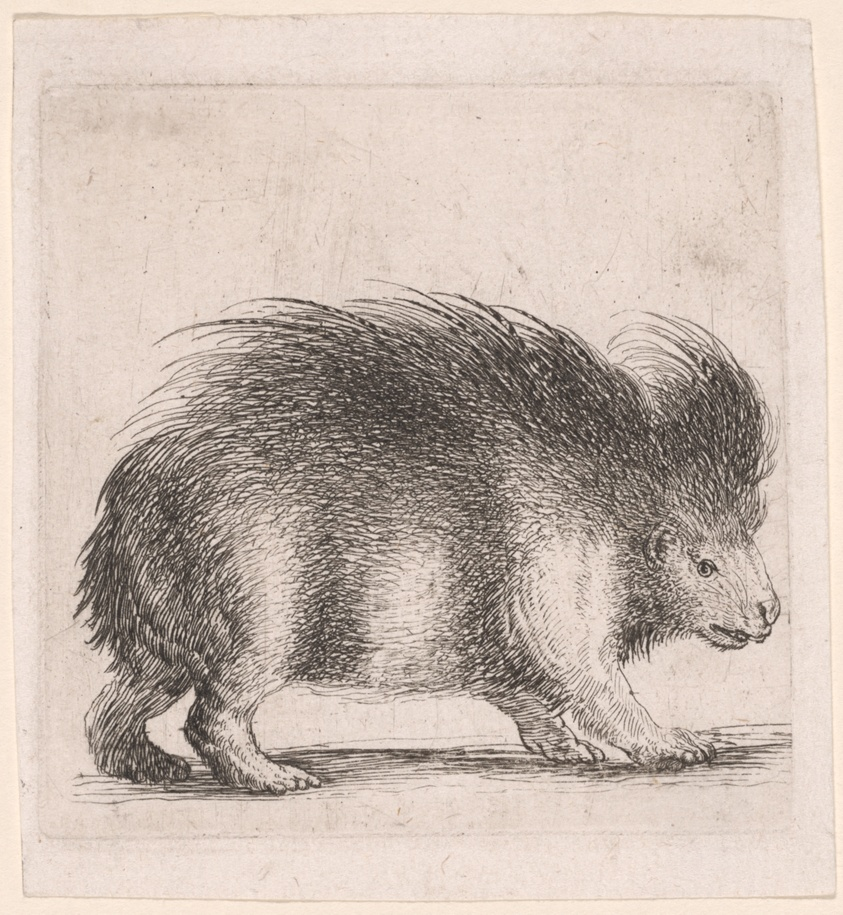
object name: Print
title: Porcupine, Facing Right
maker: Stefano della Bella (Italian, 1610-1664)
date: 1640/50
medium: Etching in black on ivory laid paper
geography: Italy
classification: prints and drawing; print; etching; paper